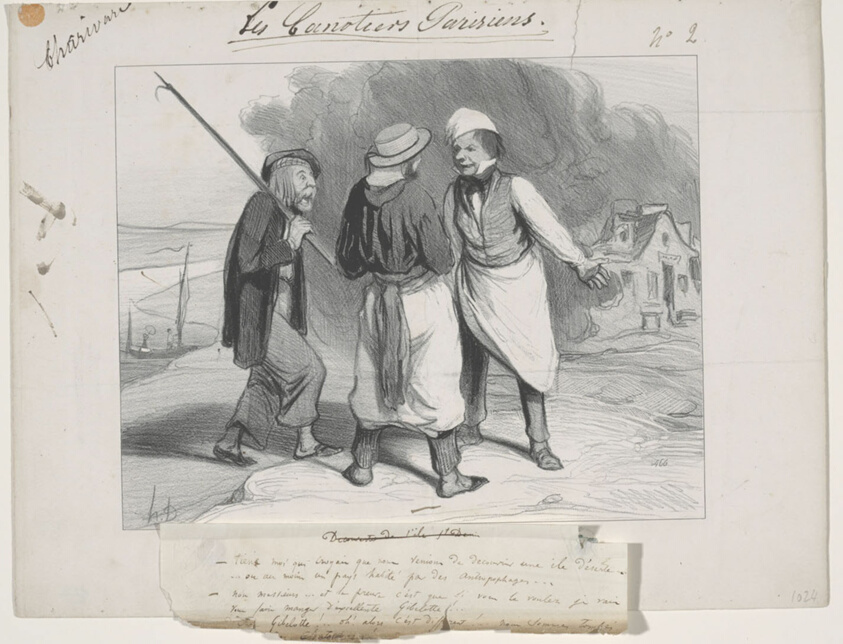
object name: Print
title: Well, fancy that! I thought that we had just discovered a deserted island or at least a country inhabited by cannibals., plate two from Les Canotiers Parisiens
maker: Honoré-Victorin Daumier (French, 1808-1879)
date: 1843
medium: Lithograph in black, with additions in pen and brown ink and caption in pen and brown ink, on ivory wove paper, tipped onto ivory wove paper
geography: France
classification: lithograph; print; prints and drawing